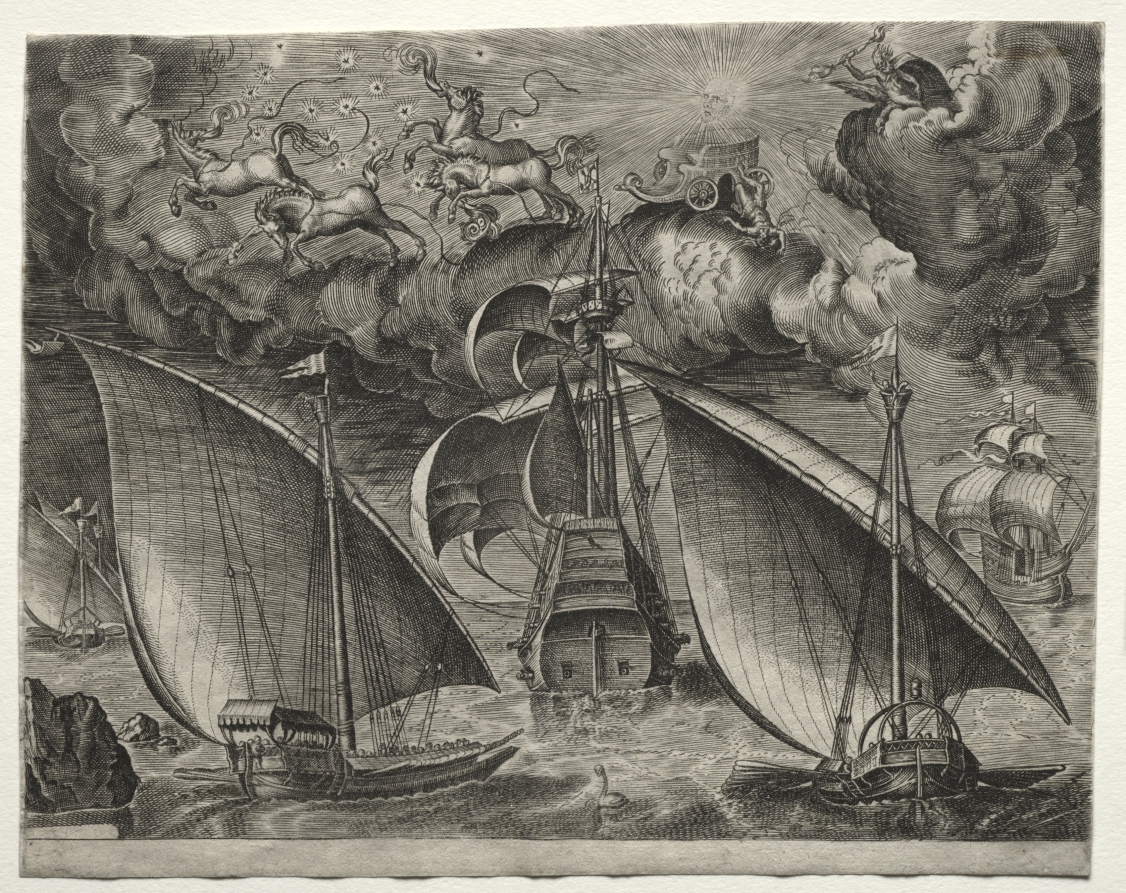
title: Sailing Vessels: Two Galleys Sailing Behind an Armed Three-Master with Phaeton and Jupiter in the Sky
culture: Flanders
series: Sailing Vessels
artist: after Pieter Bruegel (Netherlandish, c. 1525/30–1569)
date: 1561–65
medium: engraving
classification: Print